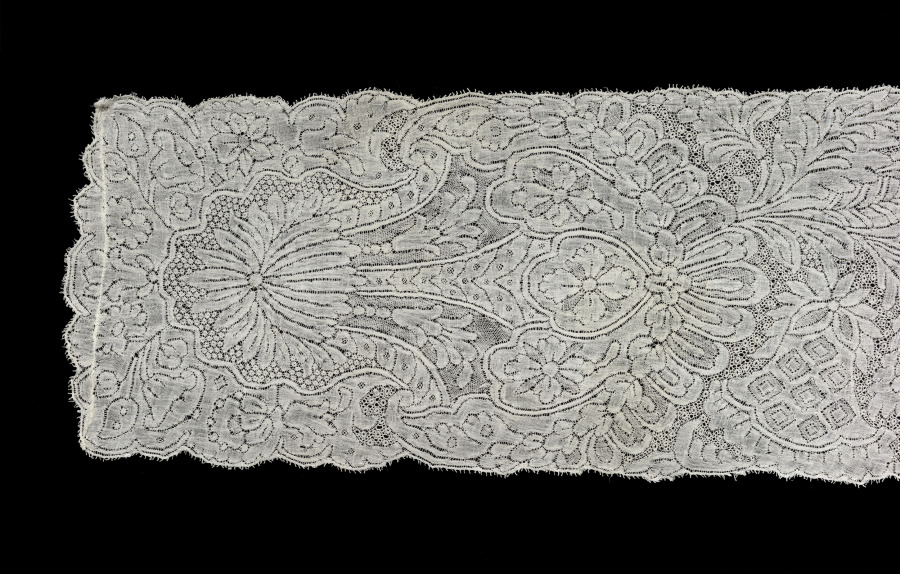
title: Lace Lappet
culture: Belgium, Binche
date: 1700s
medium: Linen: bobbin lace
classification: Lace